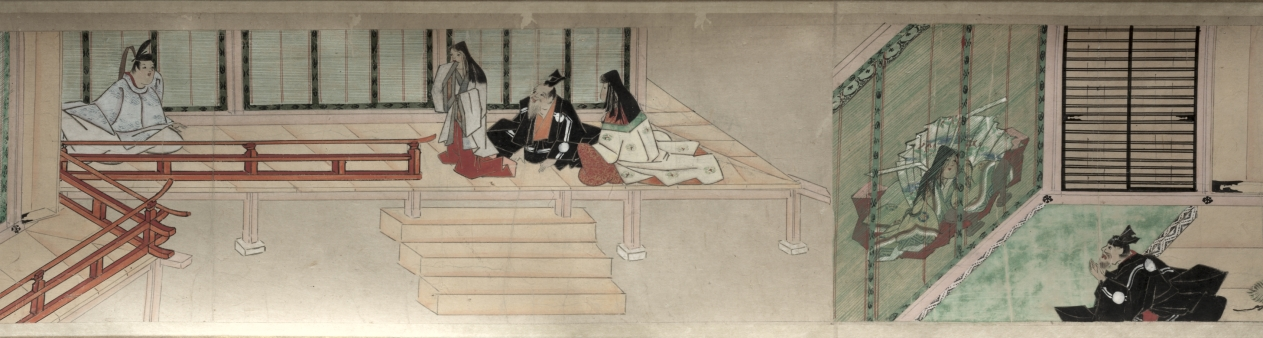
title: The Saltmaker's Story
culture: Japan, Edo period (1615–1868)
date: early 1600s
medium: One of a pair of handscrolls; ink, color, and gold on paper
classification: Painting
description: Once read and copied by girls at New Year’s celebrations and included in dowries, The Saltmaker’s Story is a rags-to-riches tale in which daughters are gifts from the gods. Despite his simple outlook, the main character progresses from humble roots as an associate at Kashima Shrine to the elite status of grandfather of the emperor through the intervention of the Kashima deity. The Saltmaker’s Story is traditionally presented in a set of three scrolls, but the text of this set has been removed by a previous owner, who remounted the illustrations as a pair. The paintings of this one take us from right to left through the second half of the tale.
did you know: This handscroll originally had texts before its paintings, but the texts were removed.